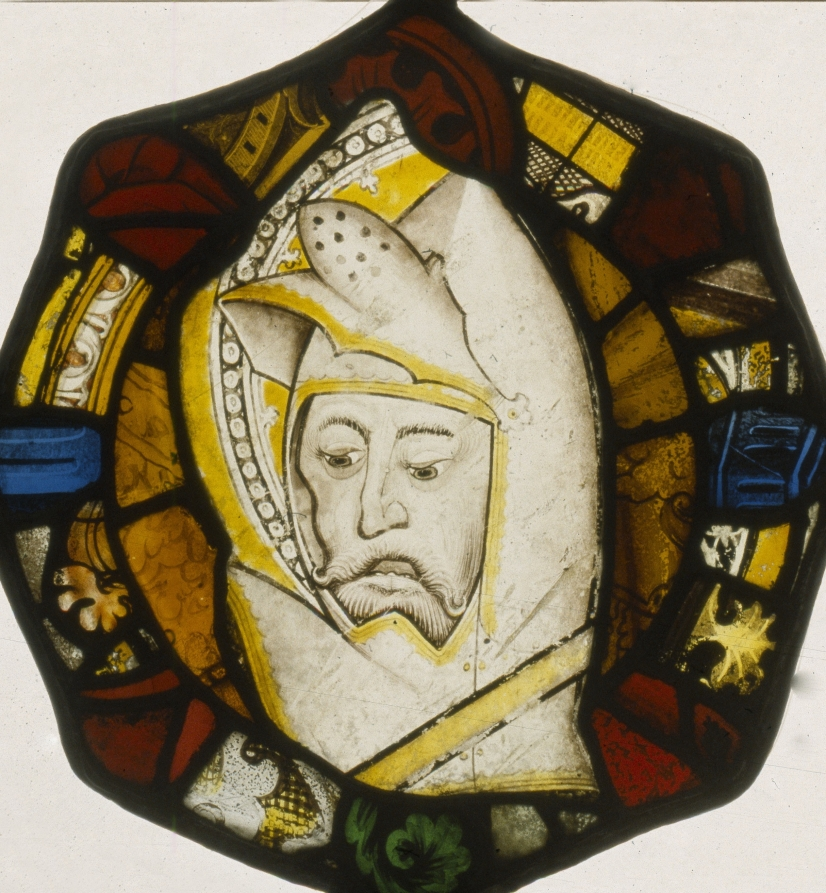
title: Saint George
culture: England, 15th century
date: c. 1440–1450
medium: white glass with silver stain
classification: Glass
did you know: This element of a stained glass window depicts Saint George, the saintly knight who was thought to have killed a dragon terrorizing a Libyan city.